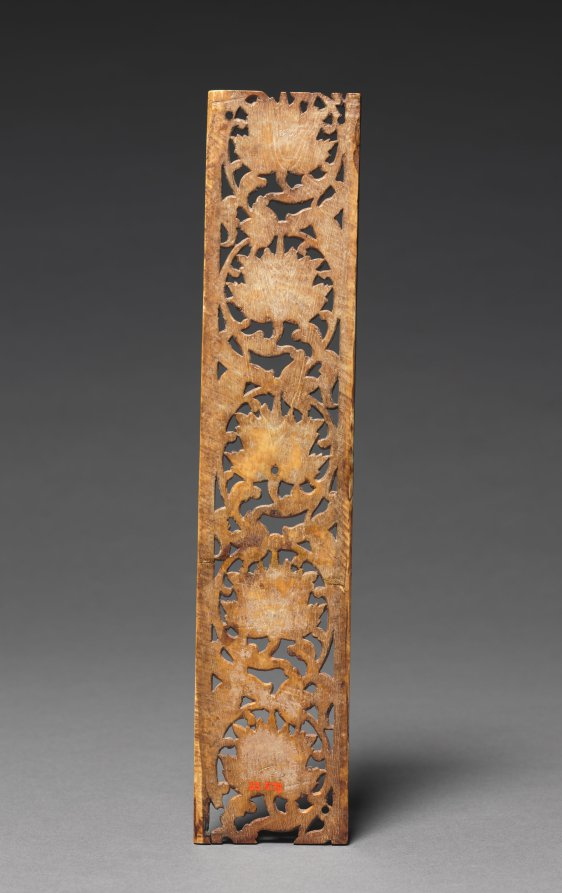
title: Cover of a Palm Leaf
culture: South India, 18th century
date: 1700s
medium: ivory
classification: Ivory